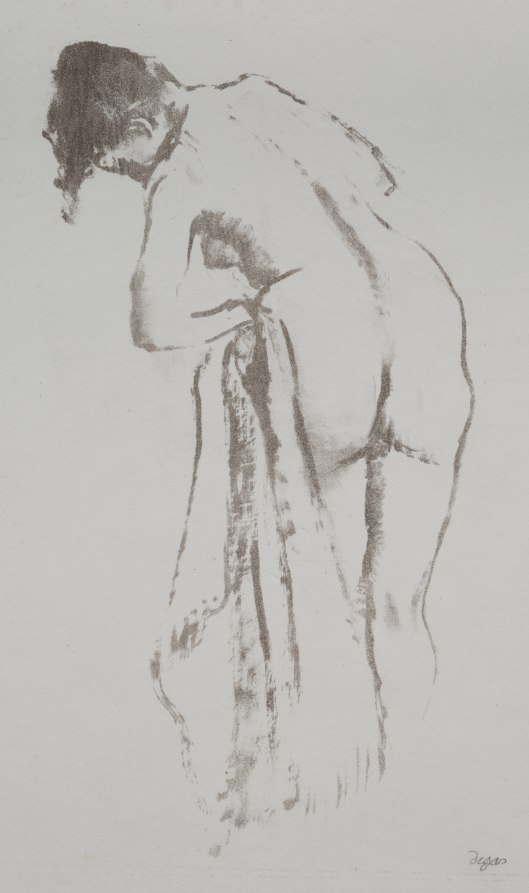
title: Nude Woman with Towel, Standing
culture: France, 19th century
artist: Edgar Degas (French, 1834–1917)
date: 1891–92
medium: lithograph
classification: Print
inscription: signed, lower left: "Degas" in pencil